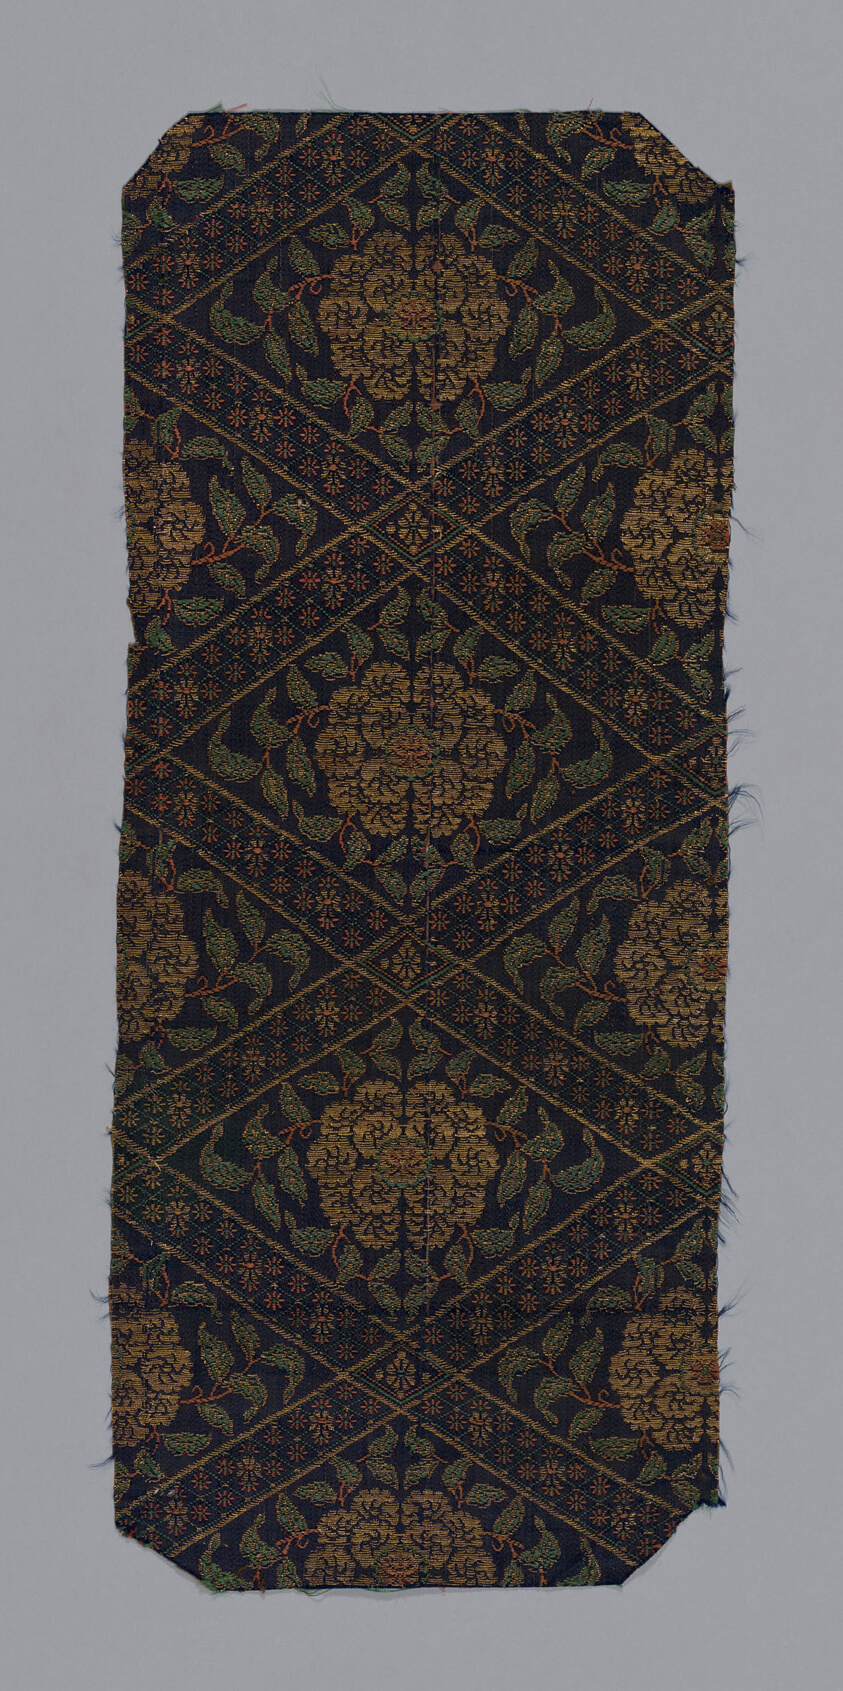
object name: Textile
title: Fragment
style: Japanism, asian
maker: Japan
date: 18th century, late Edo period (1789–1868)/ Meiji period (1868–1912)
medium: Fancy compound satin, silk and gilt paper; two strips to m.m.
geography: Japan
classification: textile; weaving